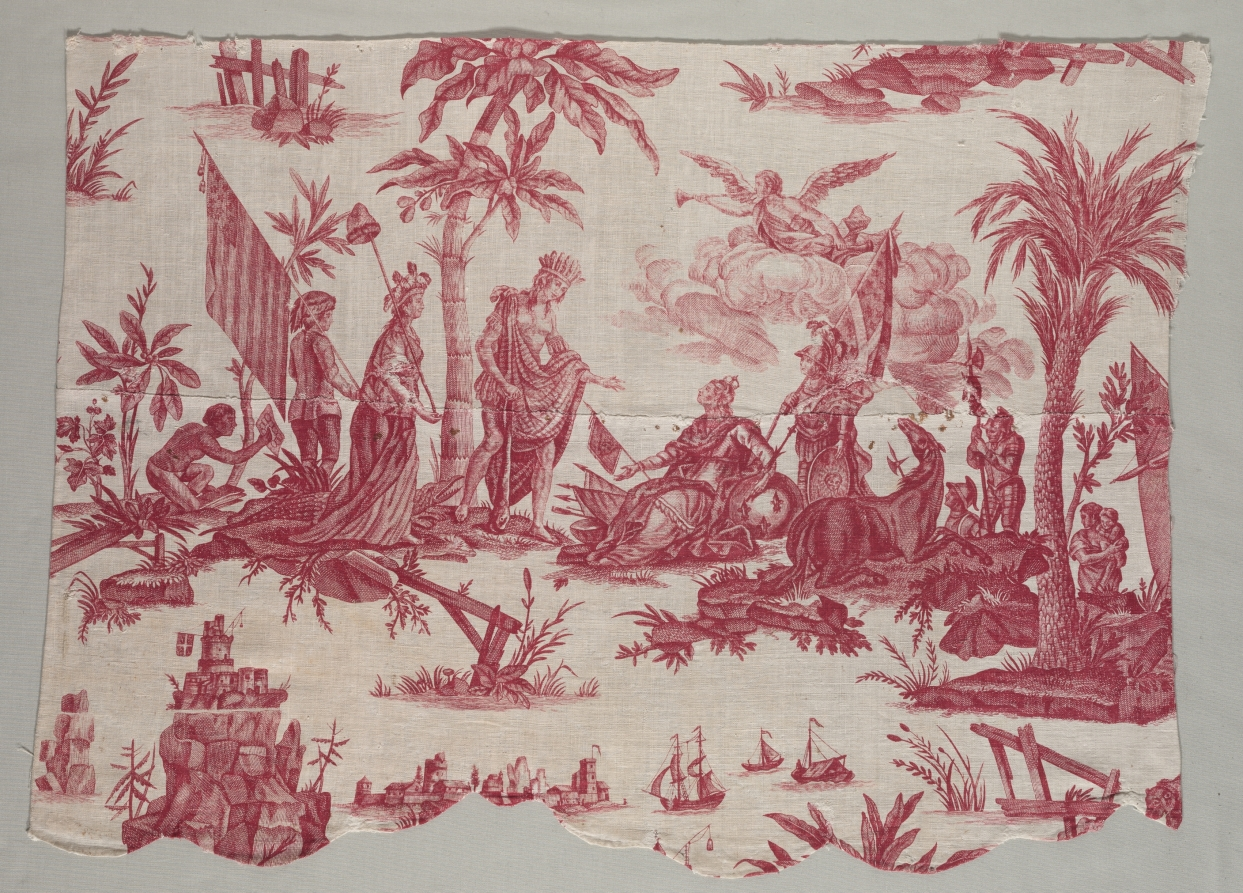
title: Fragment of Copperplate Printed Linen with "America Doing Homage to France" Design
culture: France, Jouy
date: 1790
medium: copperplate printed linen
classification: Textile